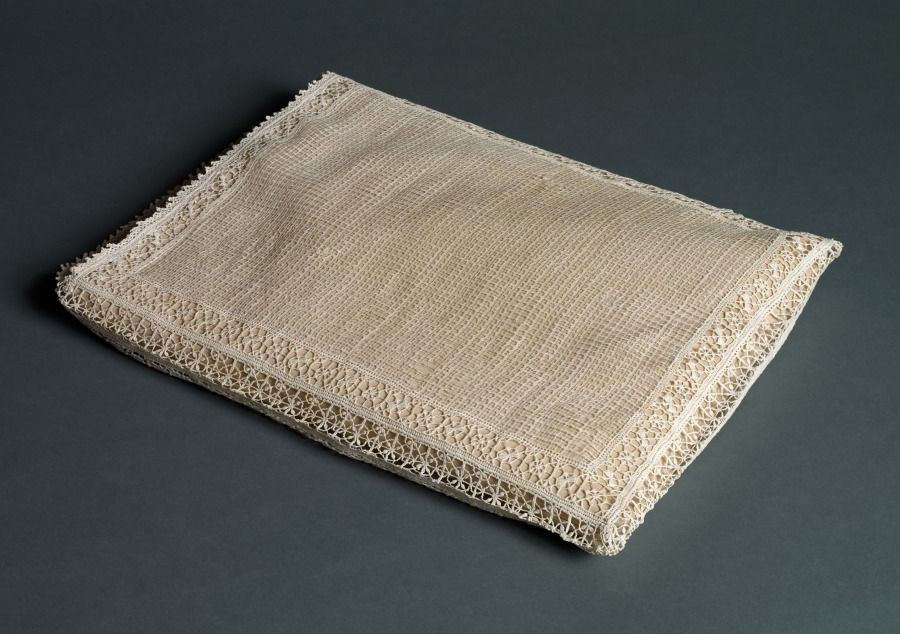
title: Lace Pillow Cover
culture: Italy, Genoa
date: 1600s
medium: Linen: needle lace (drawnwork or Punto Tirato and reticella) and bobbin lace edging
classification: Lace